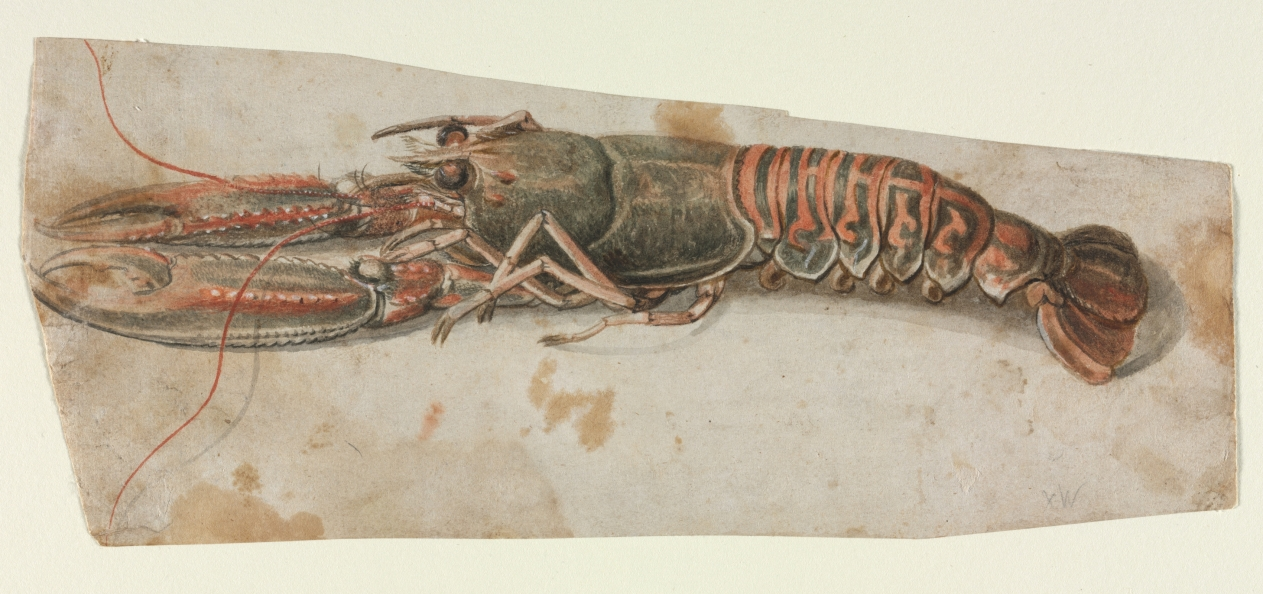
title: Lobster (recto)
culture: Flanders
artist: Anonymous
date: 1600s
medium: brush and black, gray and brown wash, and red watercolor, heightened with white gouache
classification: Drawing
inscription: lower right, in graphite: XW